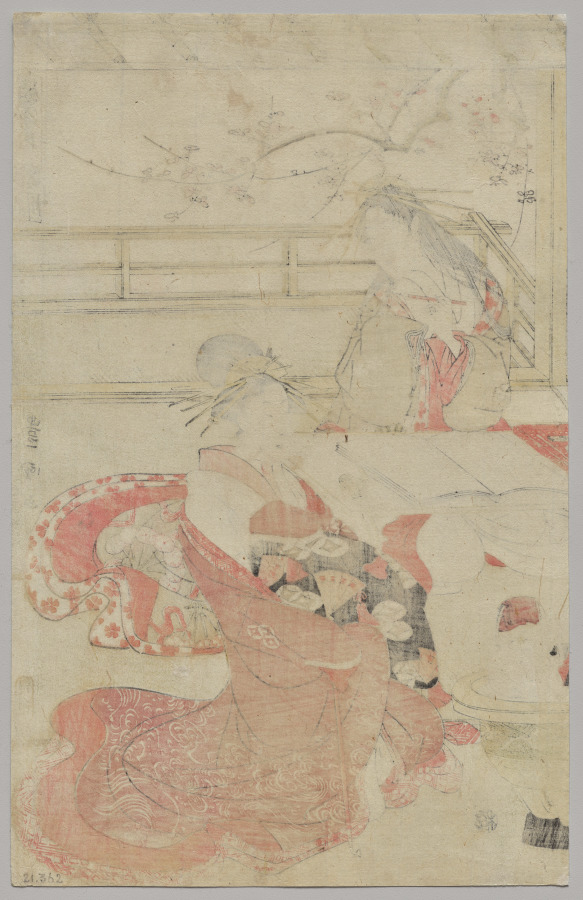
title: Courtesans of the Ōgiya on a Spring Outing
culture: Japan, Edo period (1615–1868)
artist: Utagawa Toyokuni (Japanese, 1769–1825)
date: mid- or late 1790s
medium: One of a triptych of woodblock prints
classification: Print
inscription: Signature: Toyokuni ga Publisher: Izumiya Ichibei (Senichi han) Censorship Seal: kiwame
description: In these prints, two courtesans of the Ōgiya brothel are entering an open pavilion, while another group gathers around a Japanese hibachi inside. Hanaōgi, the most celebrated courtesan of Ōgiya in the late 1700s, is depicted at a desk. Holding a brush in her hand, she turns her head to one side as if gathering her thoughts before writing in the book before her. Both her position and her loosened hair separate Hanaōgi from her courtesan companions who wear elaborate coiffures. This depiction of her captures both her knowledge of poetry and her skill as a calligrapher.